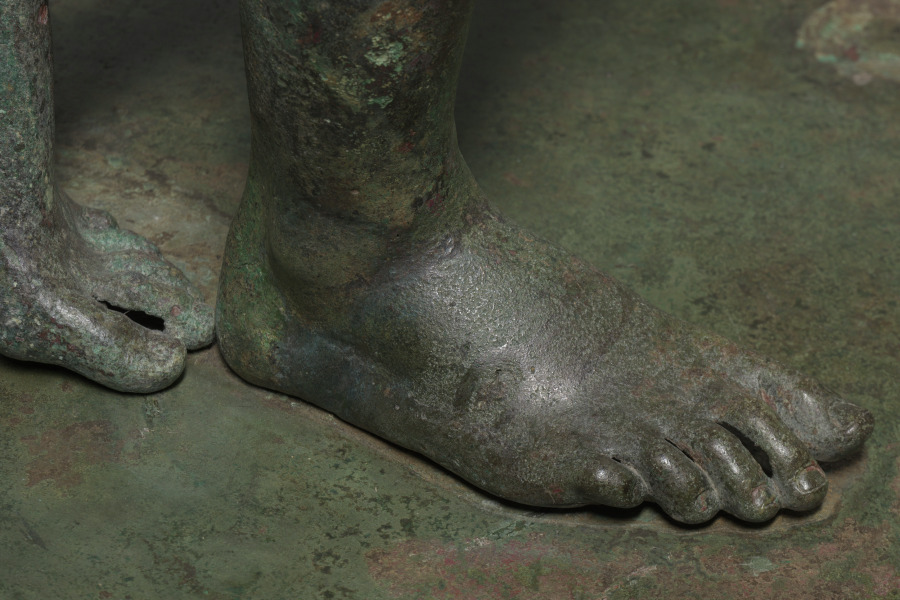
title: The Cleveland Apollo: Apollo Sauroktonos (Lizard-Slayer) or Apollo the Python-Slayer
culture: Greece, Athens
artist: attributed to Praxiteles (Greek, Athenian, c. 400–330 BCE)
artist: or Follower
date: c. 350–200 BCE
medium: bronze, copper and stone inlay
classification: Sculpture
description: The Cleveland Apollo was cast in multiple sections using the indirect lost-wax technique. First, molds were taken from a working model (now no longer known or preserved), which was then reproduced in hollow wax sections, each filled with a clay core. After details were added to the wax models, each was encased in clay. Then, the wax was heated, melted out, and replaced by molten bronze. Once cooled, the hollow bronze sections were fused together and finished, patching flaws and adding inlays and other details. Since the initial model was retained, it could be reused, allowing ancient sculptors to create multiples and variations of favorite works. Thus, remarkably, the Cleveland Apollo may once have been one of several such works. The consistently thin walls of the Cleveland Apollo (mostly 5-6 mm thick), together with the nearly invisible joins between most cast sections, show that it was created by highly skilled sculptors and foundry workers. Close looking reveals several noteworthy features. First, ovals atop the right foot mark a fusion weld, where molten bronze pooled to join separately cast sections. Second, small rectangular bronze patches cover parts of the surface (especially the right hip), each carefully cut and then hammered into place over holes or other casting defects. Inlaid lips, nipples, and eyes (the right ancient stone, the left now a modern replacement) added to the lifelike appearance of the sculpture, contrasting with the once bronze-colored skin. Finally, radiography helps to illuminate hidden features, such as the cast edge of the neck of Apollo.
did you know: Ovals across the top of the right foot show a clear join between separately cast sections.